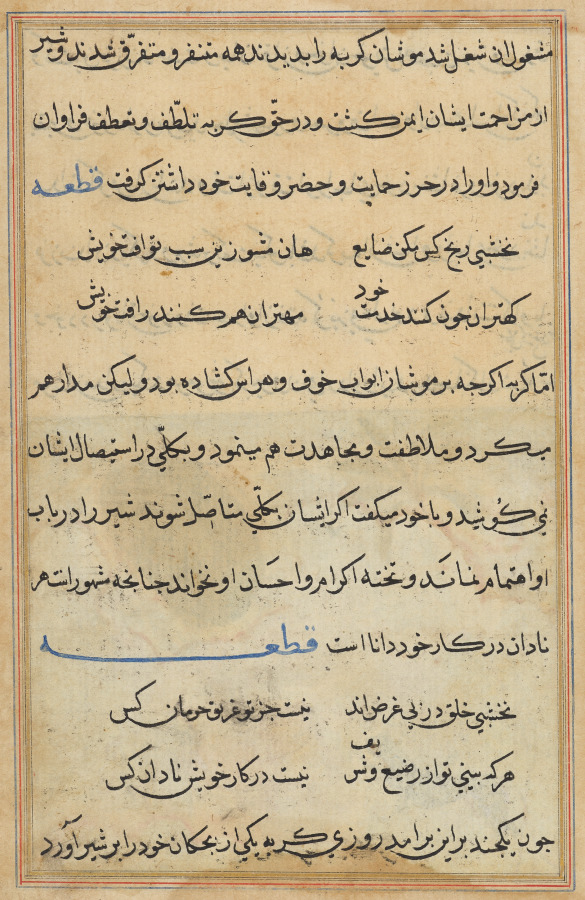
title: Page from Tales of a Parrot (Tuti-nama): text page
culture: Mughal India, court of Akbar (reigned 1556–1605)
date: c. 1560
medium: gum tempera, ink, and gold on paper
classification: Painting